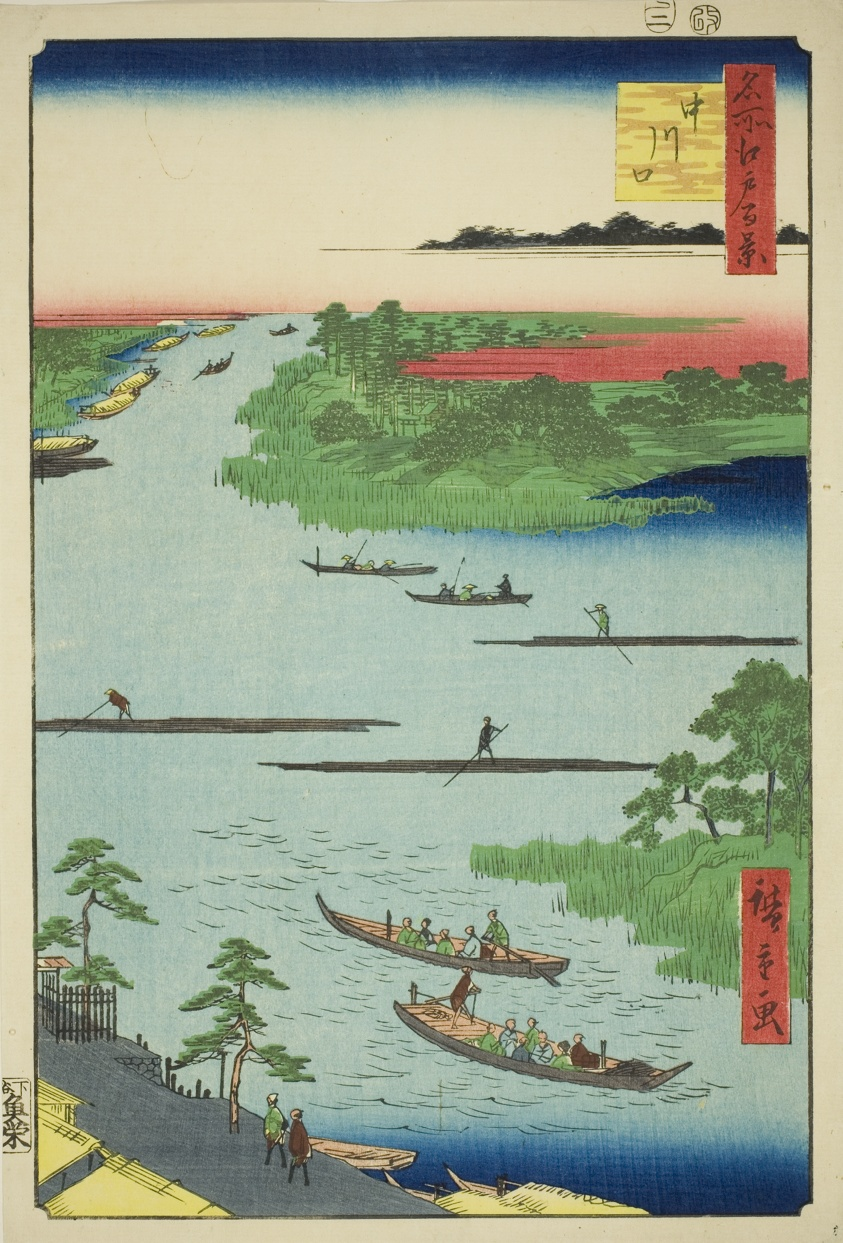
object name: Print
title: Mouth of the Nakawaga River (Nakagawaguchi), from the series “One Hundred Famous Views of Edo (Meisho Edo hyakkei)”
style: Japanese (culture or style)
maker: Utagawa Hiroshige 歌川 広重; Japanese, 1797-1858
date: 1857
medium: Color woodblock print; oban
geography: Japan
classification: woodblock print; print; asian art